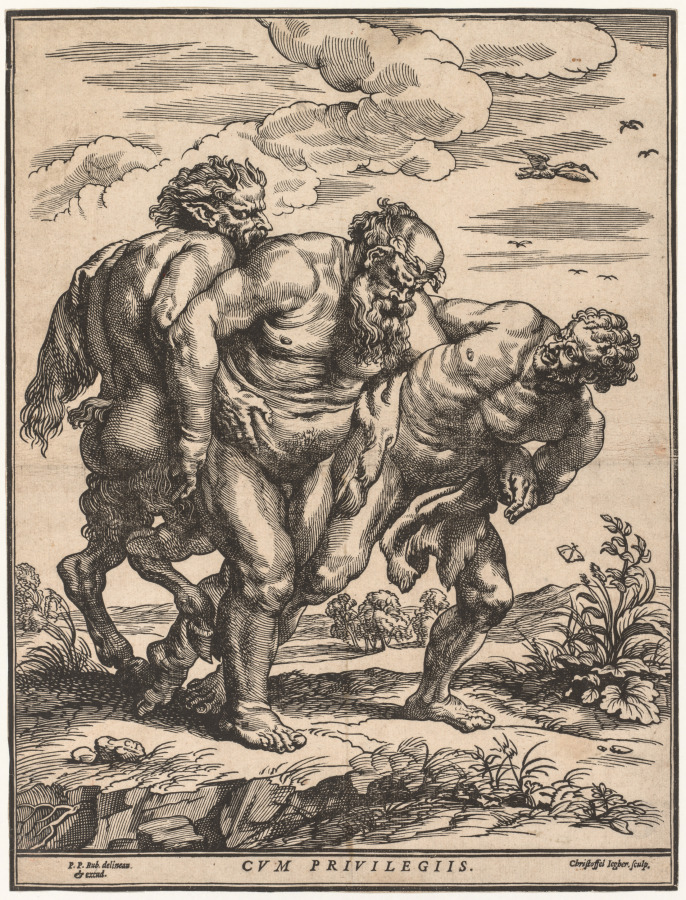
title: Silenus Accompanied by a Satyr and a Faun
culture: Flanders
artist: Christoffel Jegher (Flemish, 1596–1652/53)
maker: after Peter Paul Rubens (Flemish, 1577–1640)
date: 1630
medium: woodcut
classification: Print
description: Flemish painter Peter Paul Rubens made several images of Bacchus and his teacher, Silenus. Silenus’s incessant overindulgence in wine presented comic possibilities, as seen here, where he walks naked in a stupor with the support of two others. Some artists, including Rubens, were attracted to Silenus for his embodiment of the intuitive and sensual parts of human nature, qualities essential to creativity. Art historians have argued that Rubens’s images of Silenus are indirect self-portraits expressing the artist’s search for creative inspiration and spiritual insight while inhabiting a highly corruptible human body.